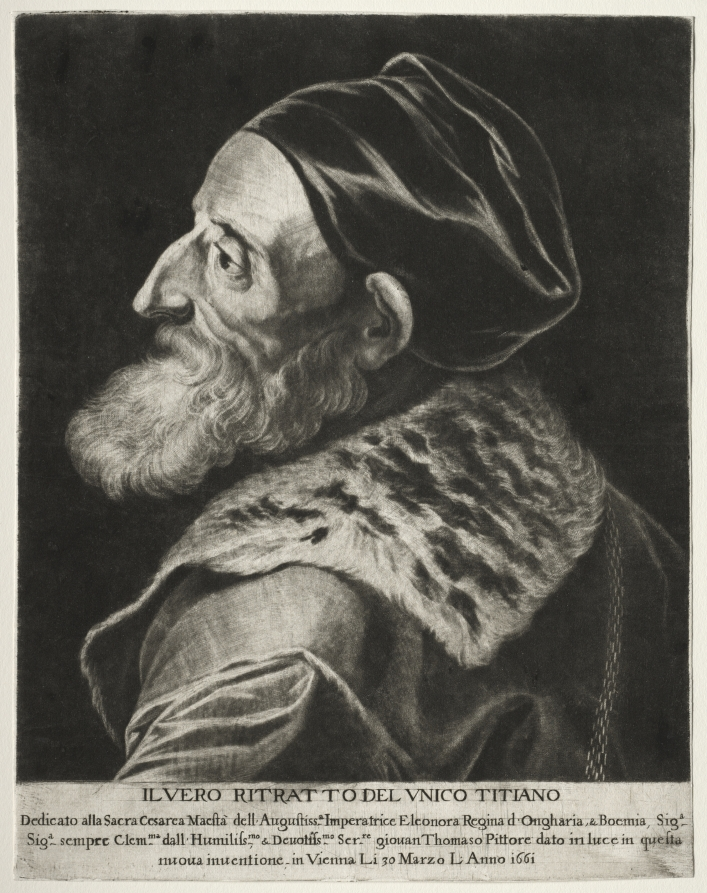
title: Portrait of Titian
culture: Flanders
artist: Jan Thomas (Flemish, 1617–1678)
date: 1661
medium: mezzotint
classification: Print